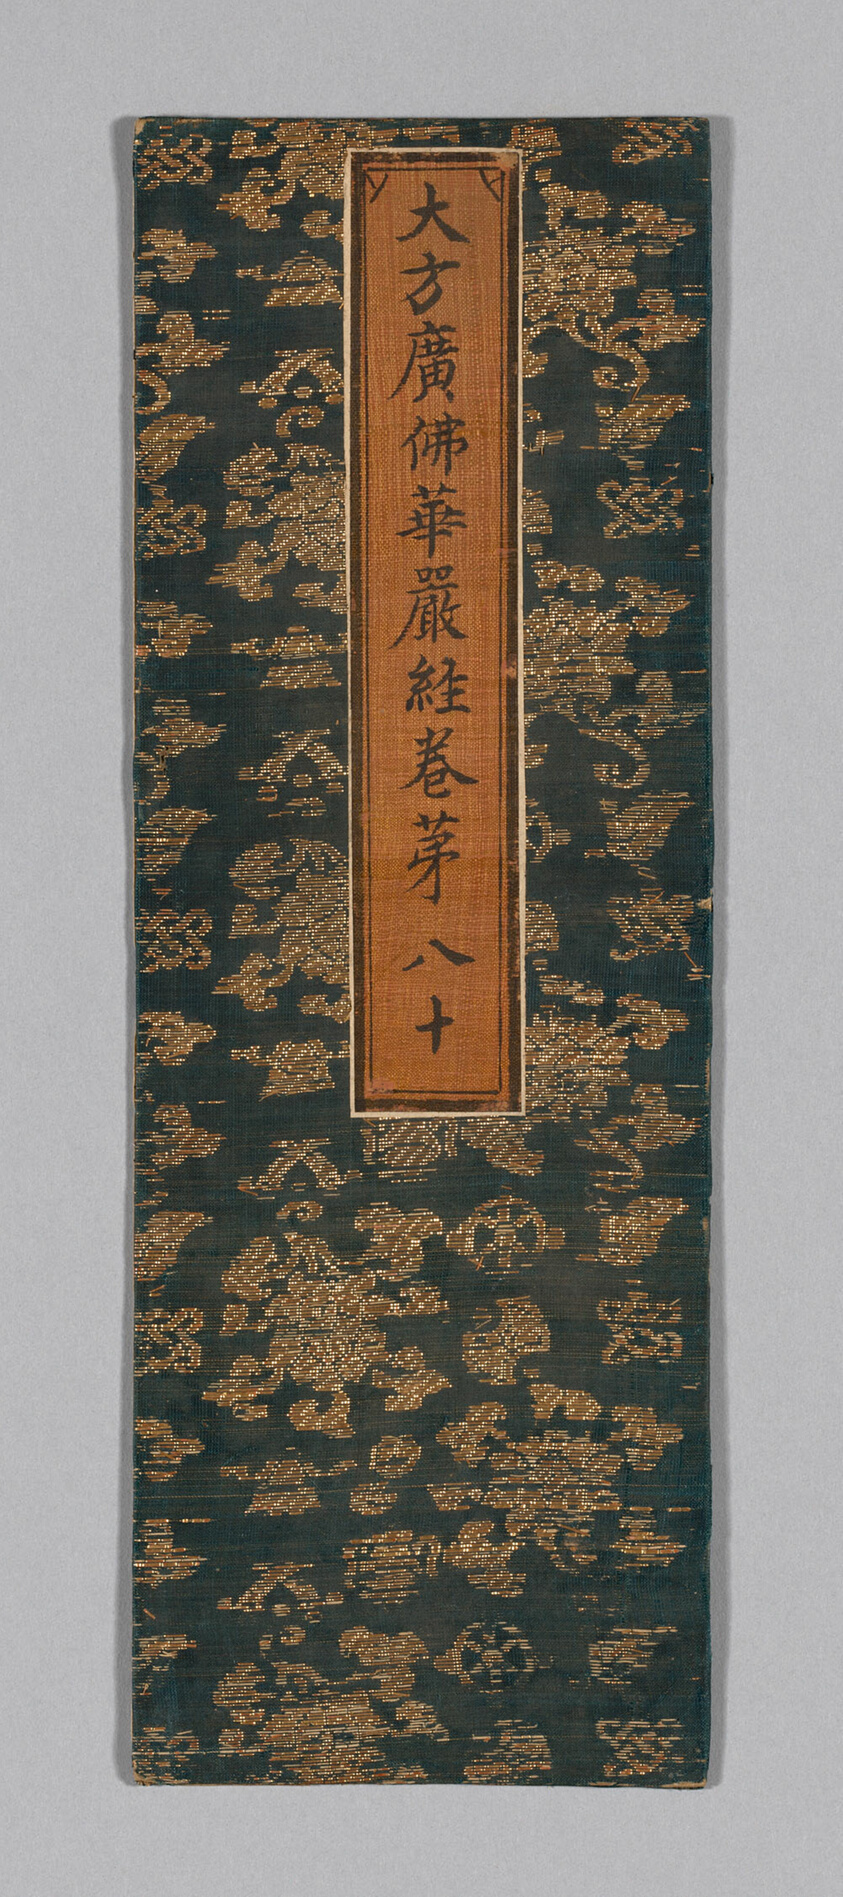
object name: Textile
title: Sutra Cover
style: ming, Chinese (culture or style), East Asian, asian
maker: China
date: Ming dynasty (1368–1644), c. 1590's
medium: Silk and gold-leaf-over-lacquered-paper strips, plain weave with supplementary patterning wefts; label: silk, plain weave; painted with ink; over paper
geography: China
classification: textile; weaving